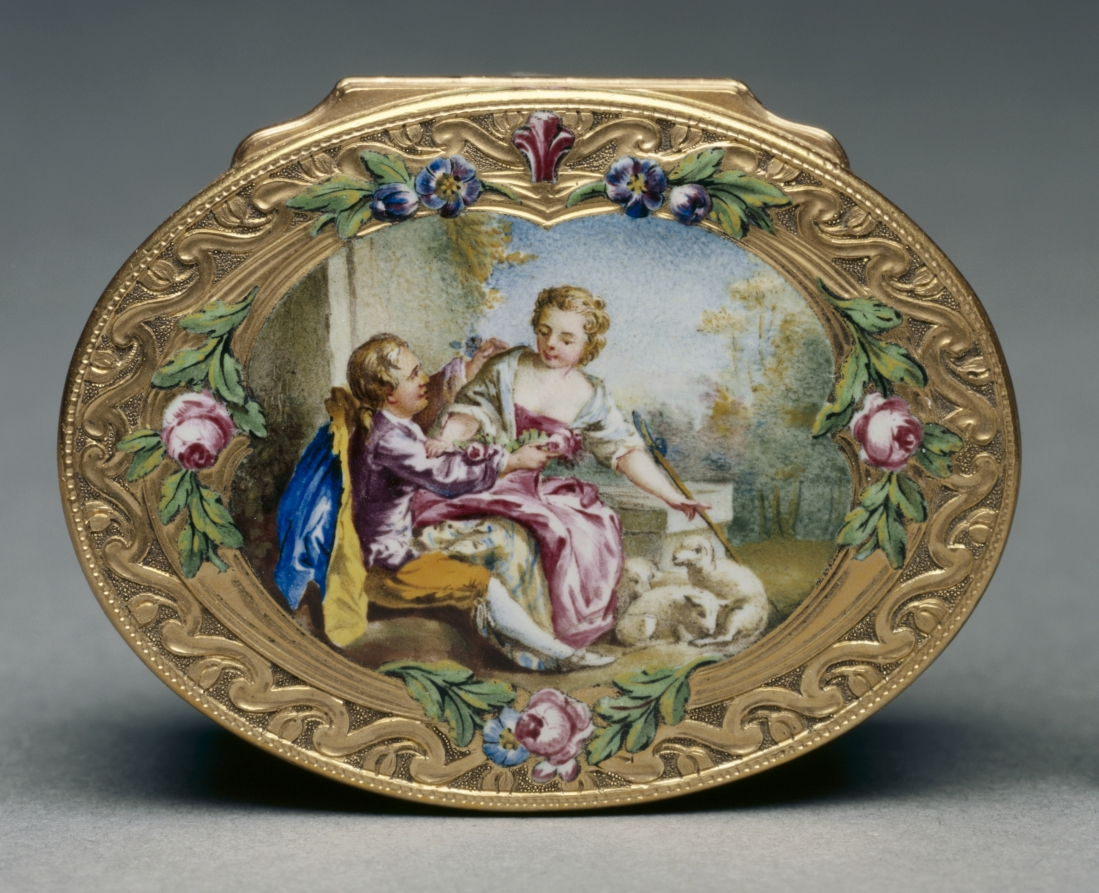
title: Snuff Box (Tabatière)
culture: France, 18th century (style of Louis XV)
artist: Francois Guillaume Tiron (French)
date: 1761–62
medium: gold and enamel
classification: Miscellaneous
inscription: [Maker's mark of Francois-Guillaume Tiron, master goldsmith in 1747, inside cover]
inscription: [Warden's mark, Paris, 1761-1762, inside cover]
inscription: [Charge mark of Eloi Brichard and Etienne Somfoye, Paris, 1756-1762, inside cover]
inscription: [Maker's mark of Francois-Guillaume Tiron, inside bottom]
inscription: [Warden's mark, 1761-1762, inside bottom]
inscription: [Charge mark of Brichard and Somfoye, inside bottom]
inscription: [Maker's mark of FG Tiron, left wall]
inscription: [Charge mark of Brichard and Somfoye, left wall]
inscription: [Warden's mark, Paris, 1761-1762, left wall]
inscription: [Discharge mark of J.J. Prevost, Paris, 1762-1768, bezel at right]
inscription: [Engraved number, maybe retailer's number]: "n. 13676"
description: The pastoral scenes that decorate this box are typical of the style of François Boucher, a celebrated painter of the period whose works were popularly reproduced on decorative arts. Snuff boxes, used practically as containers for powdered tobacco, were often decorated with miniature reproductions of notable works. The miniature on the cover is inspired by Boucher’s The Galant Pastor (Le Pasteur Gallant) (1738) and that on the bottom by The Amusement of the Shepherd Girl (L’Amusement de la Bergère) (1700s).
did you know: François Boucher was a favorite of the French royal court of Louis XV and named first painter of the king in 1765.